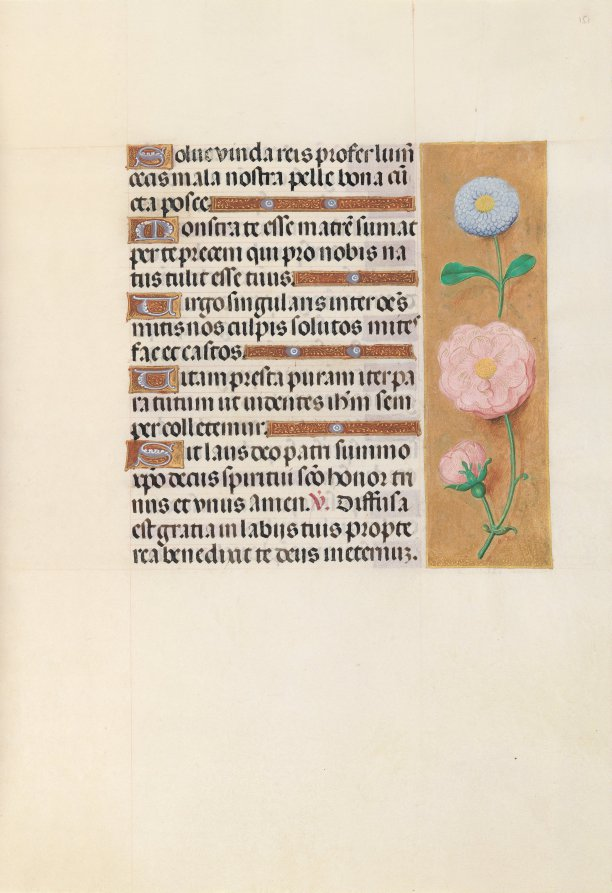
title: Hours of Queen Isabella the Catholic, Queen of Spain: Fol. 151r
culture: Flanders, Ghent and Bruges, late 15th century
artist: Master of the First Prayerbook of Maximillian (Flemish, c. 1444–1519)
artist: and Associates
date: c. 1500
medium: ink, tempera, and gold on vellum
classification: Bound Volume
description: This manuscript was illuminated by a circle of at least five highly organized manuscript painters active in the Flemish cities of Ghent and Bruges. The principal illuminator was Alexander Bening, who painted the majority of the book's miniatures. Manuscripts produced by this circle of artists are renowned for the decoration of their borders, which typically feature a rich variety of realistically-painted flowers, birds, and butterflies. This prayer book, called a book of hours, was intended not for a cleric, but for the private devotions of a lay person-in this case, Isabella the Catholic, Queen of Spain (1451-1504). Isabella's coat of arms embellishes the book's frontispiece. It is unlikely that the book was commissioned by the Queen herself; rather, she probably received it as a diplomatic gift from someone courting her patronage, perhaps Cardinal Francisco Jimenez de Cisneros. A Franciscan friar, Jimenez was dependent upon Isabella for his advancement, first to the post of Queen's confessor in 1492, and then to Archbishop of Toledo in 1495.